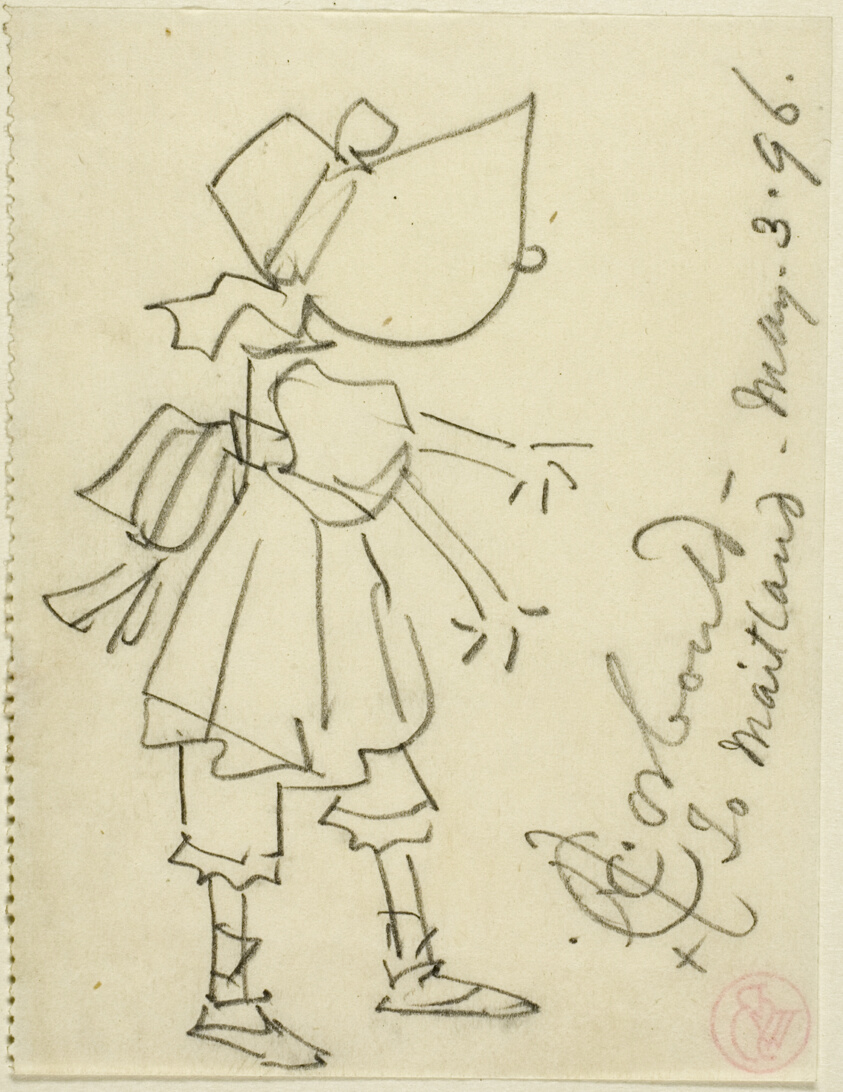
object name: Drawing and Watercolor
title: Girl in Bonnet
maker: Edward Henry Corbould (English, 1815-1905)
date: 1896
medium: Graphite drawing on paper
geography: England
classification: graphite; drawings (visual works); prints and drawing